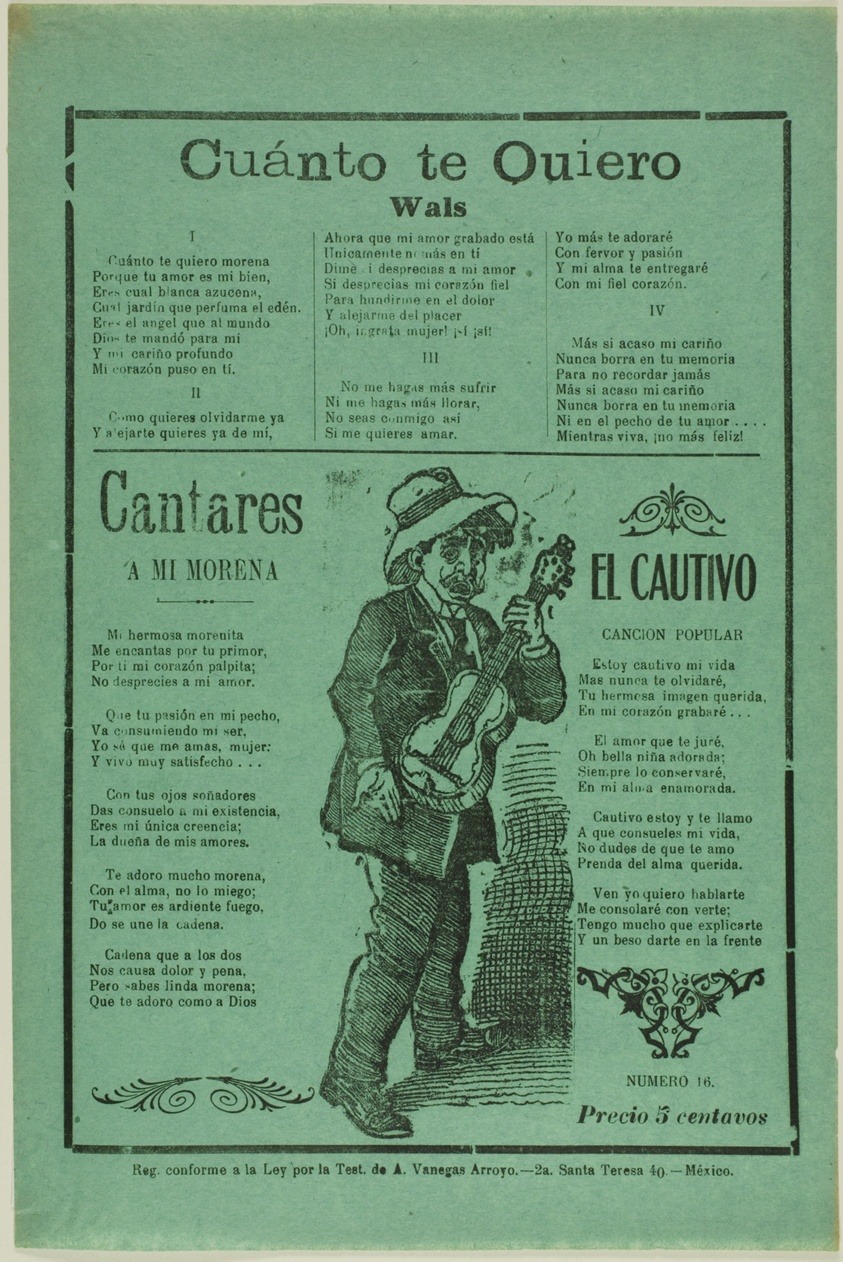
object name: Print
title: I Love You So Much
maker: José Guadalupe Posada (Mexican, 1852-1913)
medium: Relief engraving on zinc on paper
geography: Mexico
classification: relief etching; print; prints and drawing